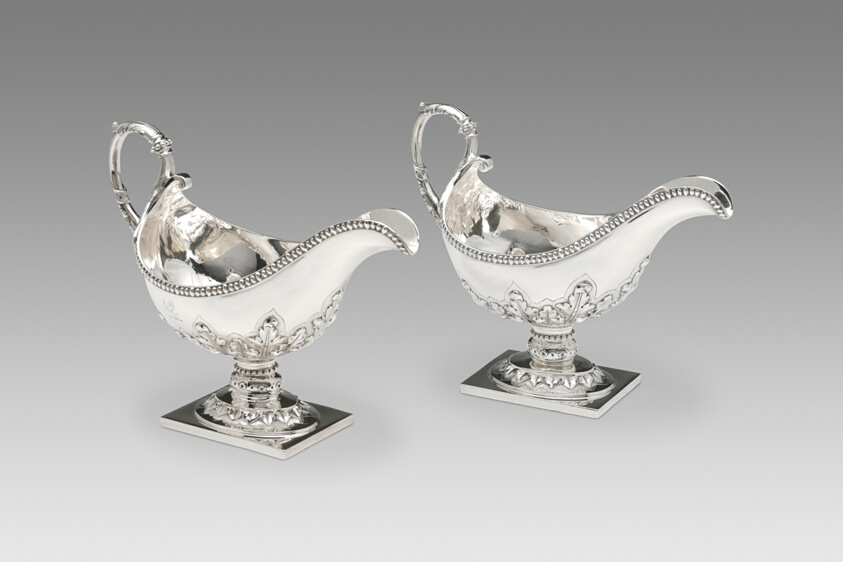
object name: Metalwork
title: Pair of Sauceboats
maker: Eoff & Shepard; American, 1852–1861; Edgar Mortimer Eoff; American, active 1852–1860; George L. Shepard; American, active 1852–1862; New York; Retailed by Ball, Black & Co.; American, 1852–1874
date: 1852–61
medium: Silver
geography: New York City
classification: sauceboat; silver; vessel for serving food; american decorative arts; american arts; decorative arts